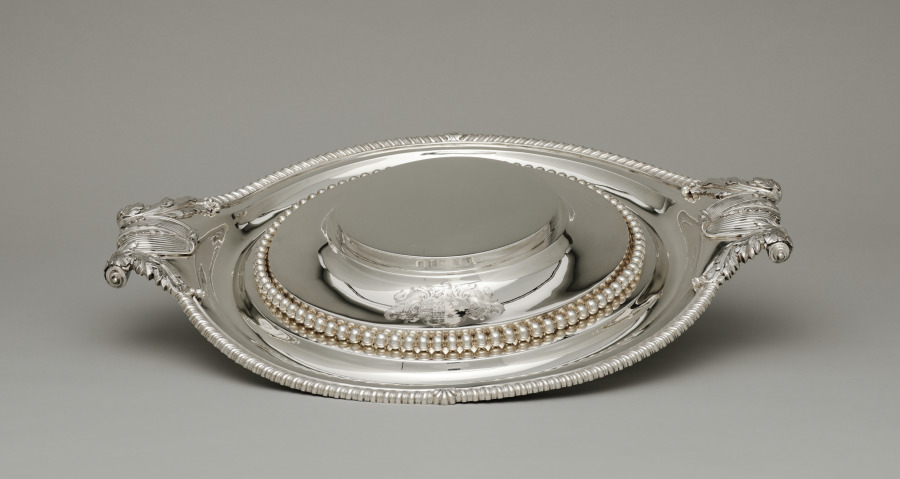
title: Stand for Covered Tureen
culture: England, London, 19th century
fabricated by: Paul Storr (British, 1771–1844)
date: 1812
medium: silver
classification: Silver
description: Silver fulfilled a prominent role in projecting wealth, status, power, and ritual in British life during the 1600s and 1700s. Elaborate forms such as this tureen stand, with its acanthus leaves and fluted detailing, not only represented wealth in its sheer silver weight but also provided royal and aristocratic owners a surface for displaying engraved coats of arms. The arms of the High Sheriff of Yorkshire, Timothy Hutton and his wife Elizabeth Chaytor of Spennithorne Hall in northern England are engraved on this stand by Paul Storr, one of the most prominent London silversmiths of the period.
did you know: This is a stand for a tureen. See cover record.